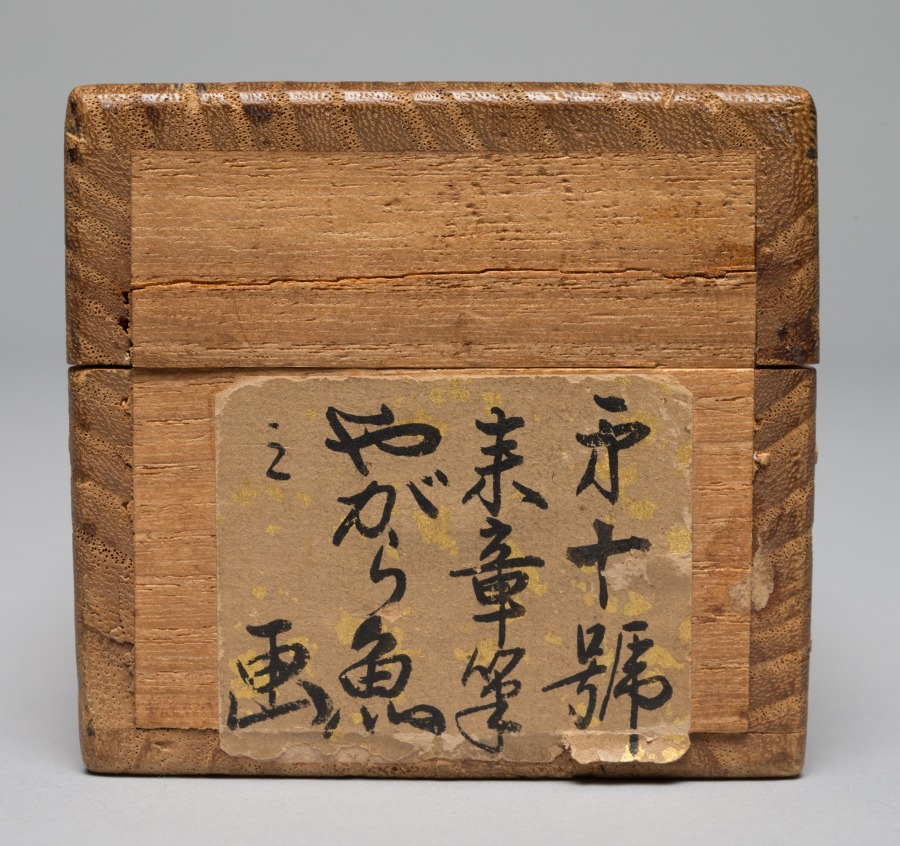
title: Needlefish (Yagara)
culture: Japan, Edo period (1615–1868)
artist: Nakajima Raishō (Japanese, 1796–1871)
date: 1870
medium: hanging scroll; ink and color on paper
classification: Painting